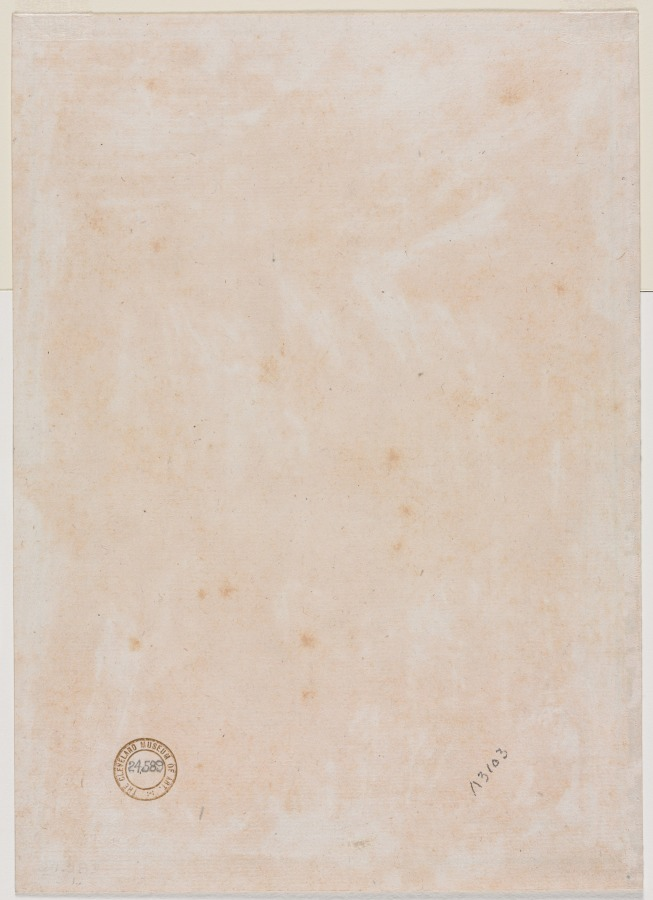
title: Several Line Borders (verso)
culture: Italy, 16th century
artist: Luzio Romano (Italian, active 1528–75)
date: mid 1500s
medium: pen and ink(?)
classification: Drawing